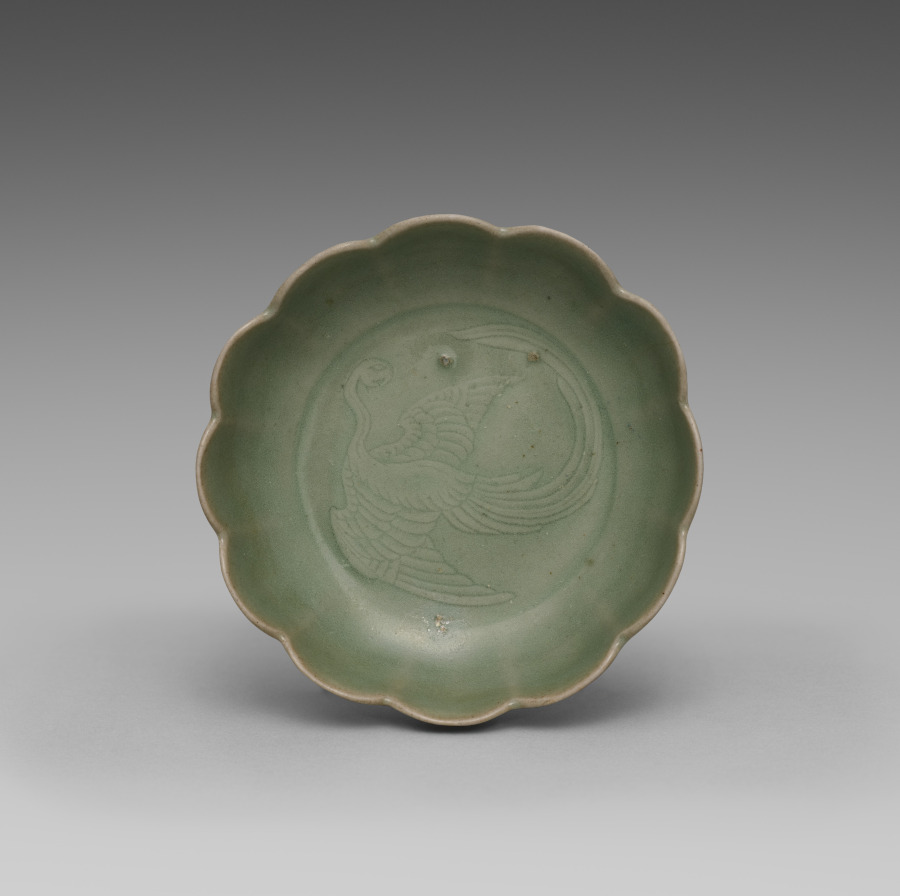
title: Celadon Dish with Molded Phoenix Design in the Shape of a Flower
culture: Korea, Goryeo dynasty (918–1392)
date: 1200s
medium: Celadon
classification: Ceramic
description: Celadon wares intended for everyday use—such as this dish—were among the most common burial objects placed in tombs during the Goryeo period (918–1392). Furnishing tombs with elaborate assemblages of objects was believed to honor the deceased and provide comfort in the afterlife. This dish, featuring the image of a flying phoenix, was likely a cherished possession that accompanied its owner to their final resting place.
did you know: The phoenix motif at the center of this dish symbolizes cosmic harmony and prosperity in traditional East Asian cultural and artistic expression.